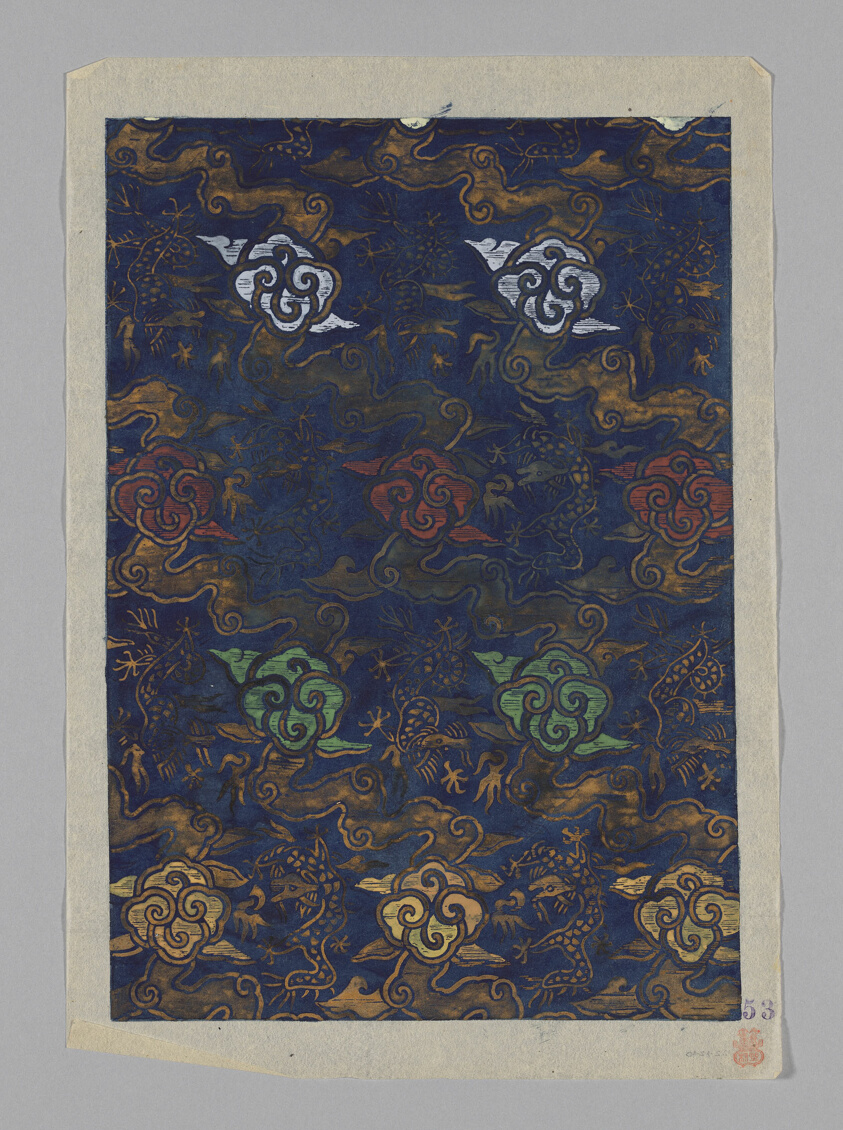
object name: Drawing and Watercolor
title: Design on Paper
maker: Japan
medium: Paper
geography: Japan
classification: textile; accessory - paper design; watercolor; paper